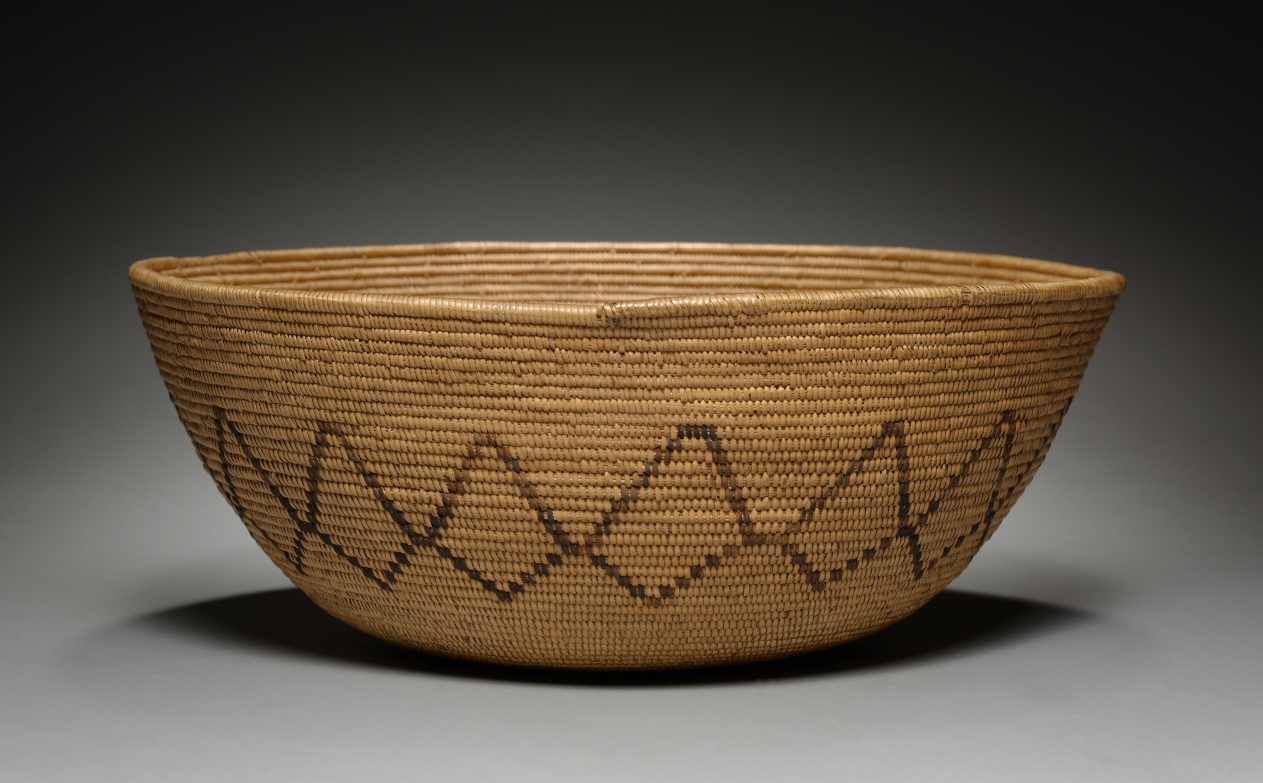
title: Bowl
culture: California, Southern, Gabrielino (San Gabriel, Mission or Tongva), Late 19th- Early 20th century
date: c 1875– 1925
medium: coiled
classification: Basketry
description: CMA Bulletin, December 1930